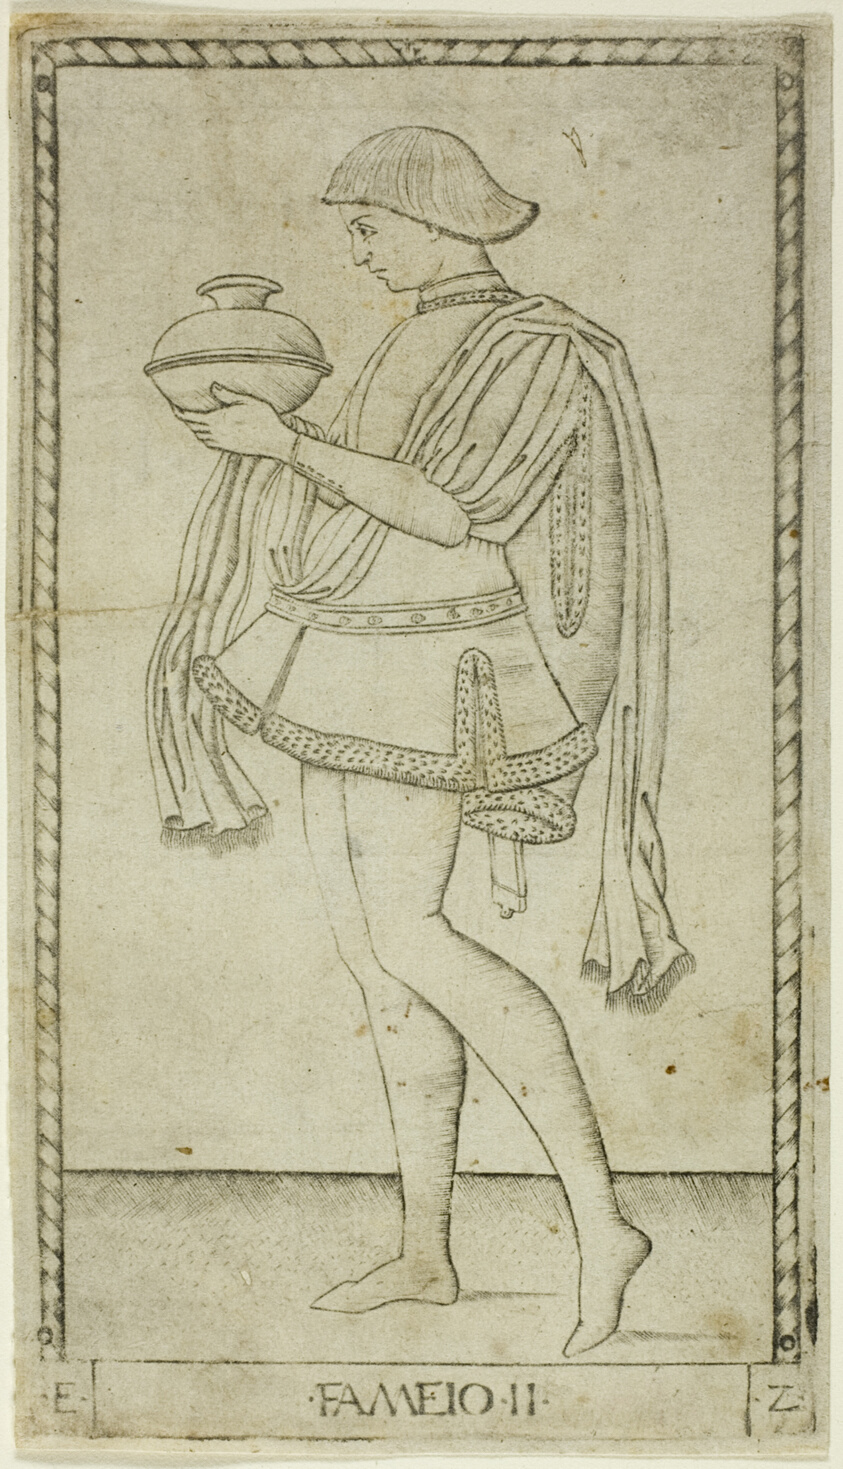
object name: Print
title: The Servant, plate two from The Ranks and Conditions of Men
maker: Master of the E-Series Tarocchi (Italian, active c. 1465)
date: c. 1465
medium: Engraving on ivory laid paper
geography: Italy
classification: engraving; print; prints and drawing